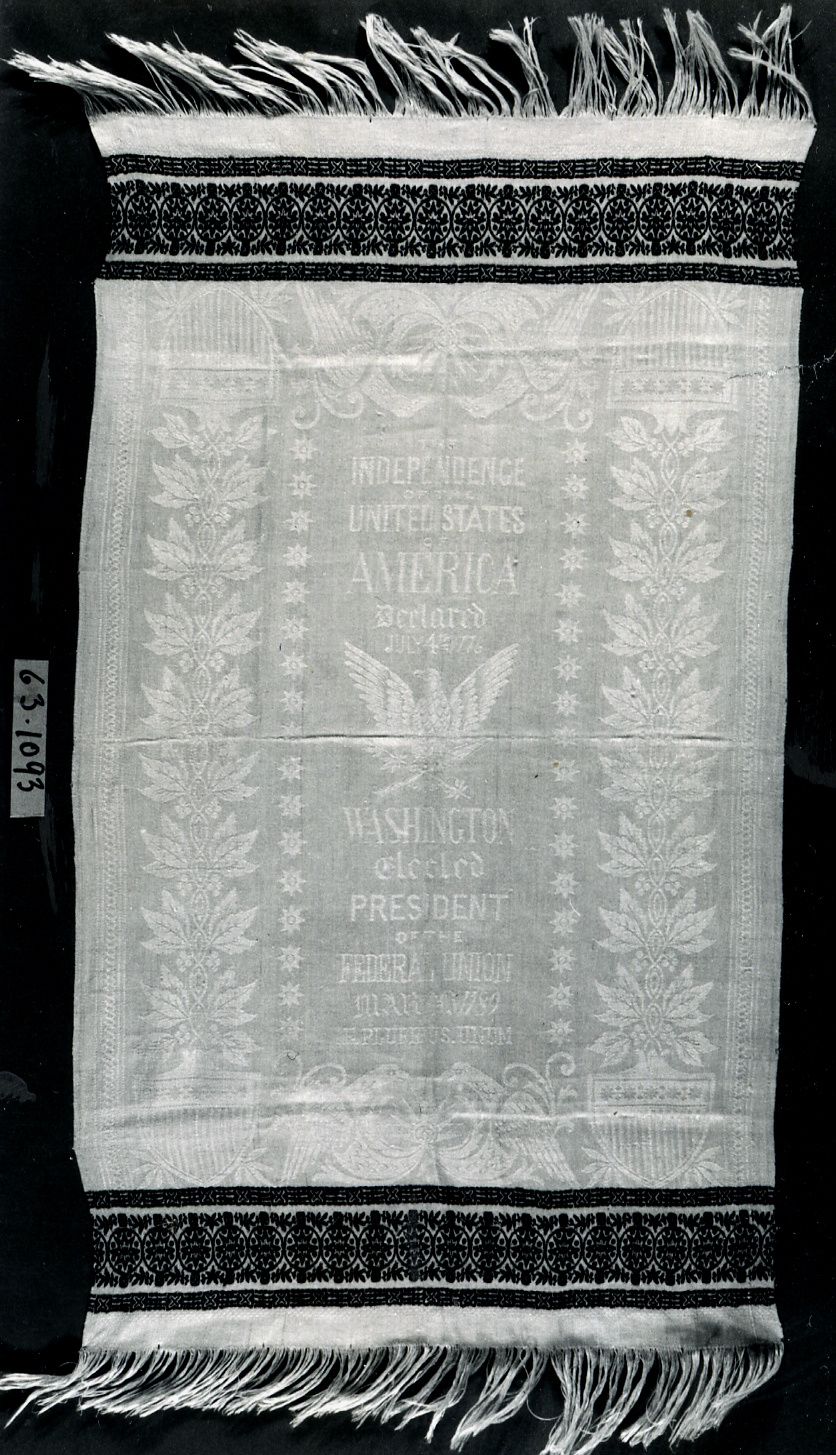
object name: Textile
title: Commemorative Towel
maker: United States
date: c. 1876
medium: Linen and cotton, satin weave with supplementary patterning wefts and self-patterned by reversing of faces and with bands of float weave; main warp cut fringe (satin damask)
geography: United States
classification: textile; weaving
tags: propaganda